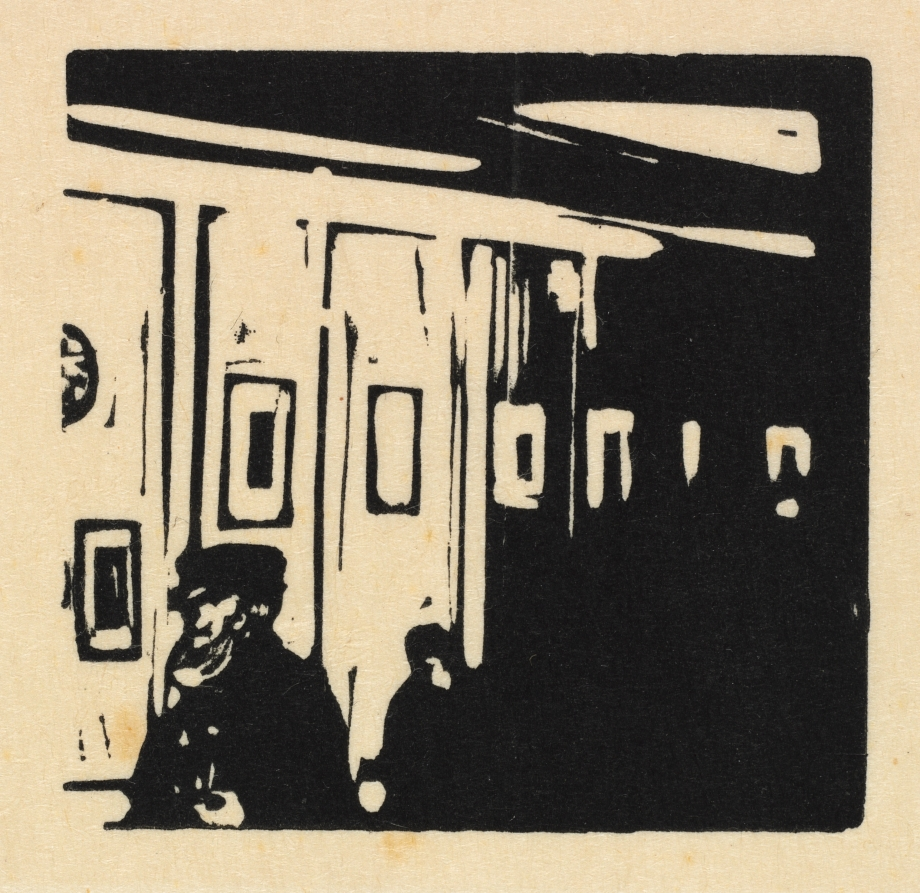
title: The Exhibition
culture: England, 19th century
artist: William Nicholson (British, 1872–1949)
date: 1897–1898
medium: lithograph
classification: Print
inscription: Verso, bottom left, in pencil: "P. 11057"